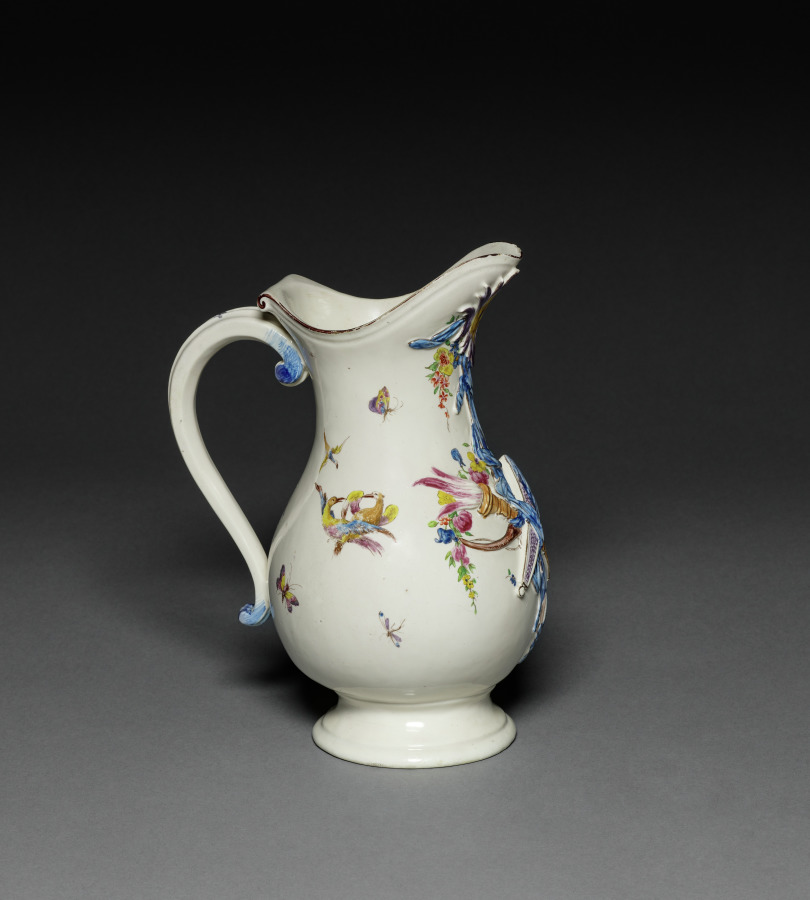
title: Ewer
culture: France, Chantilly, 18th century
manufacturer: Chantilly Porcelain Factory (French)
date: c. 1770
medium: soft-paste porcelain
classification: Ceramic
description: On the basis of the style of its decoration, particularly the symbolic trophies of love derived from the repertoire of classic ornament, this ewer and basin can be dated c. 1770. At this period, the output of the Chantilly factory was largely restricted to comparatively utilitarian table wares; pieces such as these are quite rare.